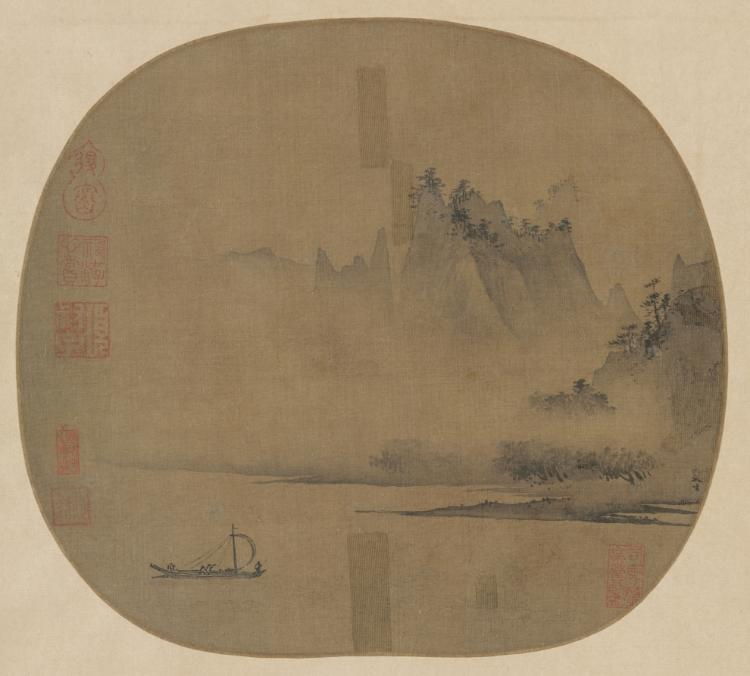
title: Full Sail on the Misty River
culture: China, Southern Song dynasty (1127-1279)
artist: assisted by Xia Sheng (Chinese, active 1200s)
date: 1200s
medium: Fan painting; ink on silk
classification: Painting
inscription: Artist's signature: Xia Sheng 夏生